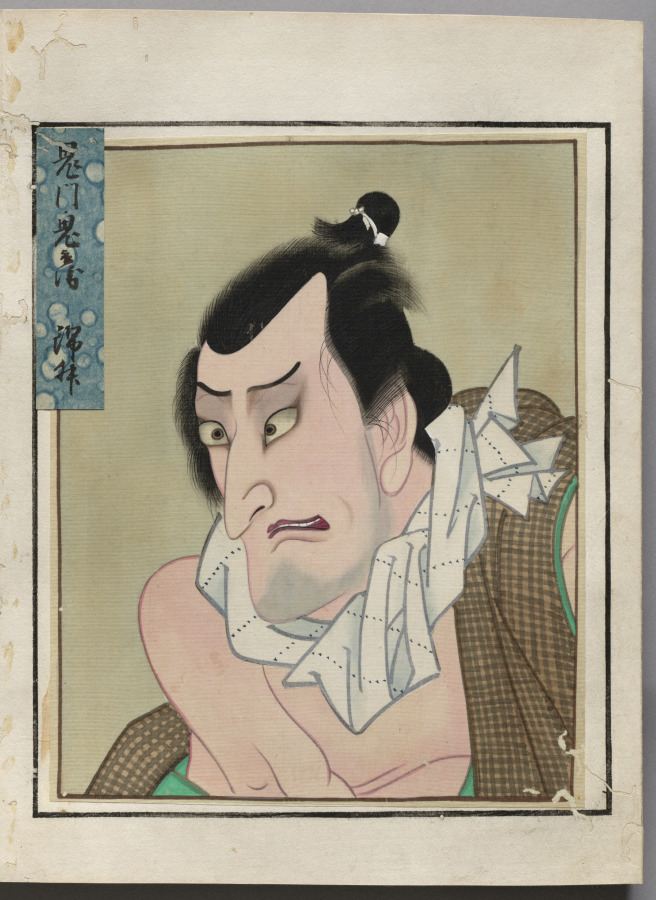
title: Double-Leaf from Album of Actor Portraits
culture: Japan, Edo period (1615–1868)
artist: Shōrakusai (Japanese)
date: c. 1790–1810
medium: double-leaf from an accordion-style album; ink and color on silk (right)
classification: Bound Volume